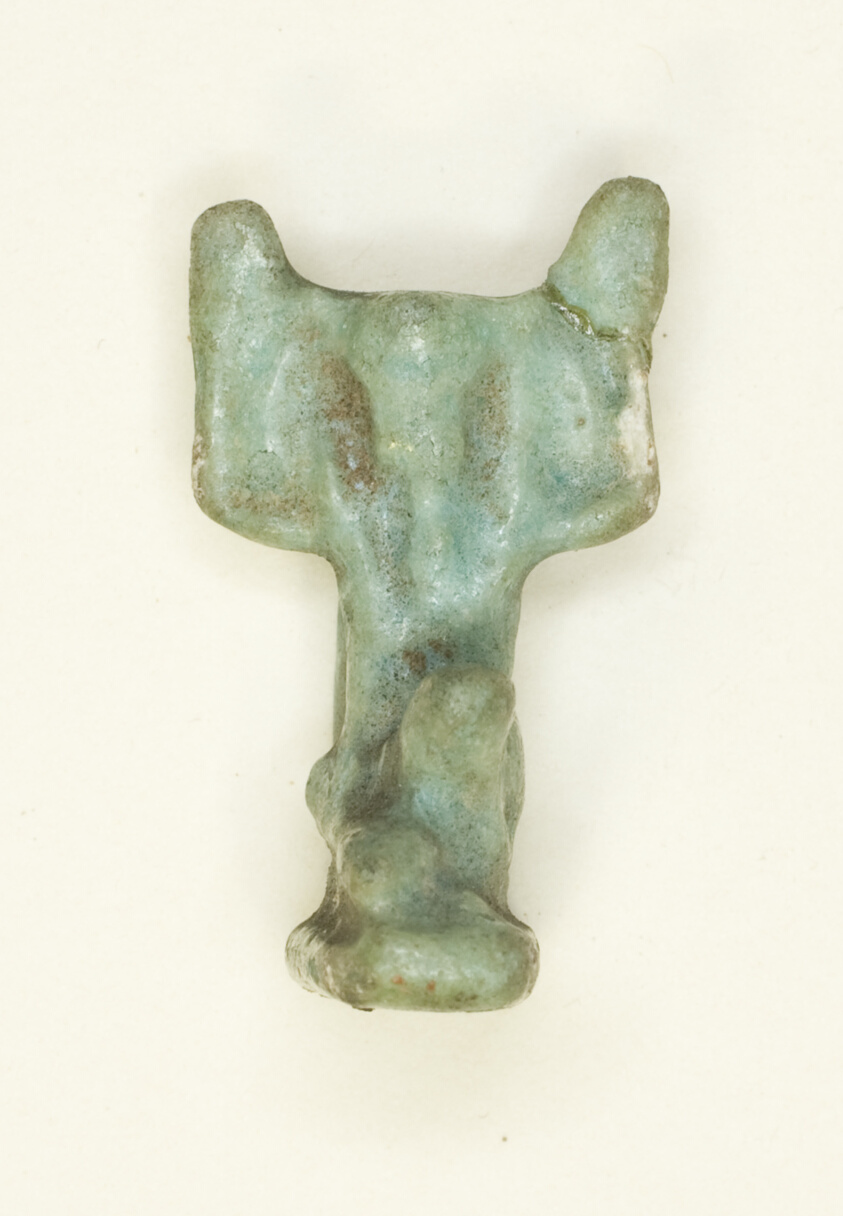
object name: Costume and Accessories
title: Amulet of the God Shu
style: egyptian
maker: Egyptian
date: Late Period, Dynasty 26–31 (664–332 BCE)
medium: Faience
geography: Egypt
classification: amulet; jewelry; ceramics; ancient art; costume; faïence (composite material)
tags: gods (deities)